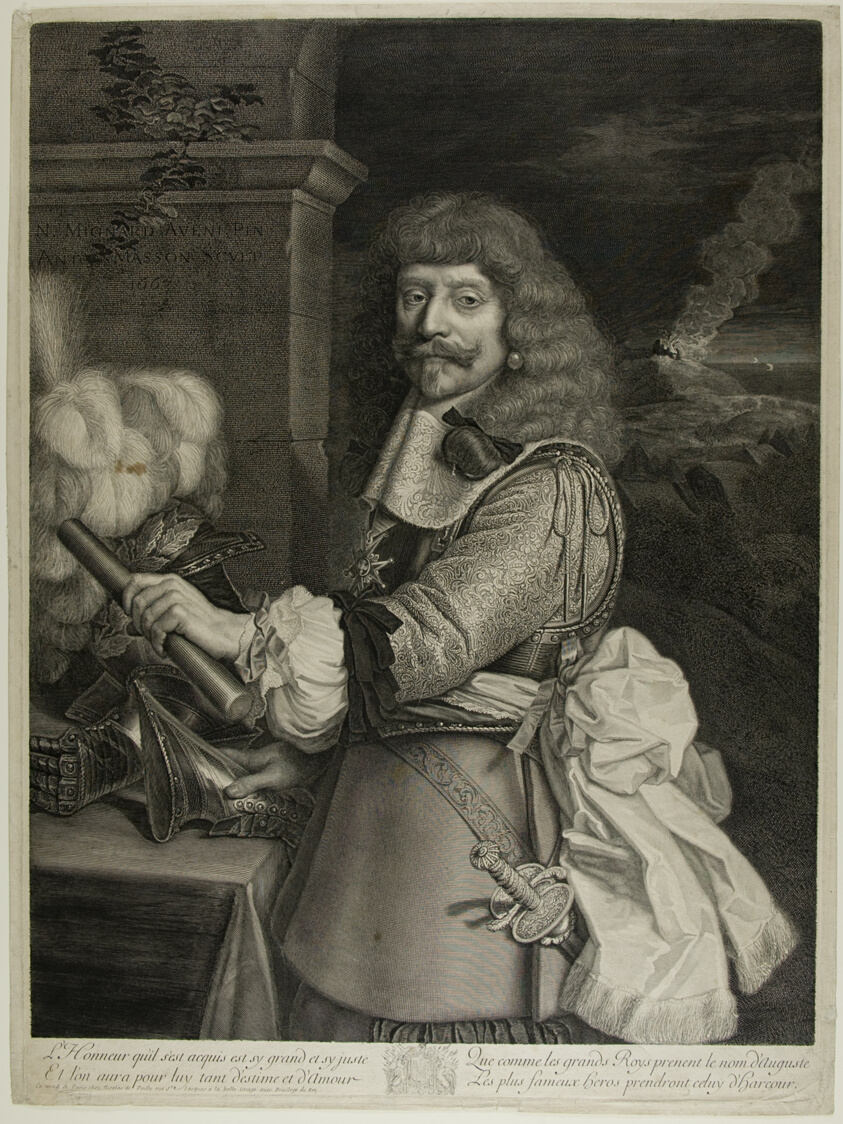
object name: Print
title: Portrait of Henri de Lorraine, Comte d'Harcourt, Horsemaster of France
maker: Antoine Masson (French, 1636-1700); after Nicolas Mignard (French, 1608-1668)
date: 1667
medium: Engraving on paper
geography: France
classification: engraving; print; prints and drawing